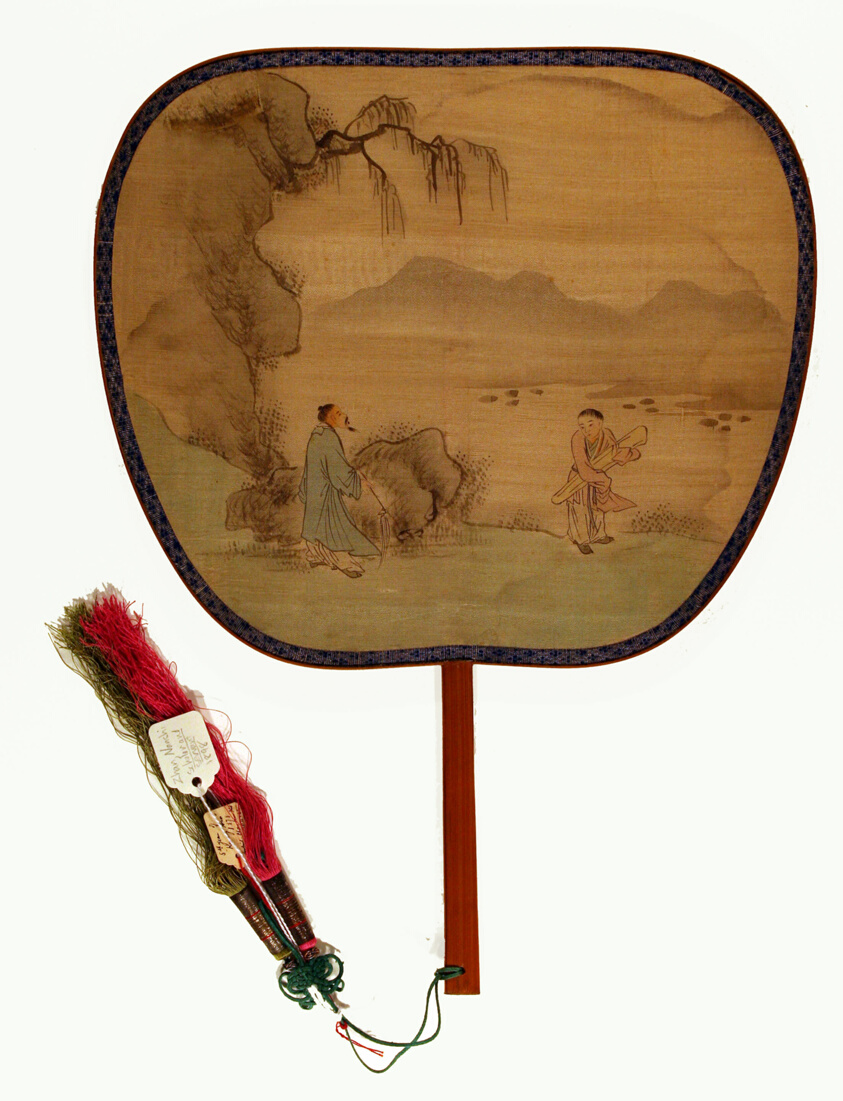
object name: Costume and Accessories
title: Scholar with Servant Holding a Qin 人物竹柄团扇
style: Chinese (culture or style)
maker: Artist unknown; Chinese, active late 19th century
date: Qing dynasty (1644–1912), 1876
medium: Fan; ink and color on silk, with bamboo handle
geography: China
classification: fan; accessories (object genre); asian art; costume